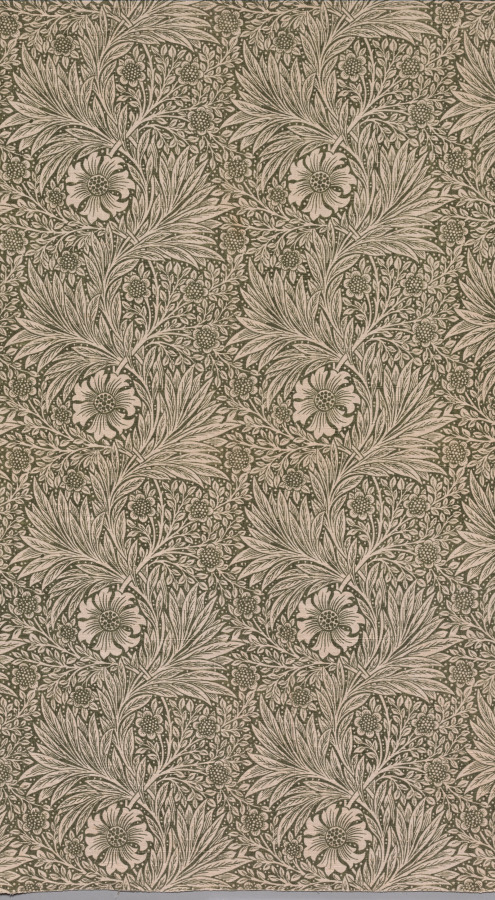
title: Marigold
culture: England, 20th century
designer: William Morris (British, 1834–1896)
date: 20th century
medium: plain weave cotton, printed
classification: Textile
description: Among Morris’s first designs for printing on fabric, Marigold was originally intended for use on wallpaper, as seen in the image below. It was one of only a few patterns that clients could buy as both textile and wallpaper; it was also printed on linoleum. The wide variety of media available in Marigold speaks to the broad decorative application of its lively organic pattern. Here, blossoms and vines spread with ordered freedom, generating a sense of movement and demonstrating Morris’s revolutionary principle of “rational growth,” which set his designs apart from the formal, rigid patterns of his competitors.